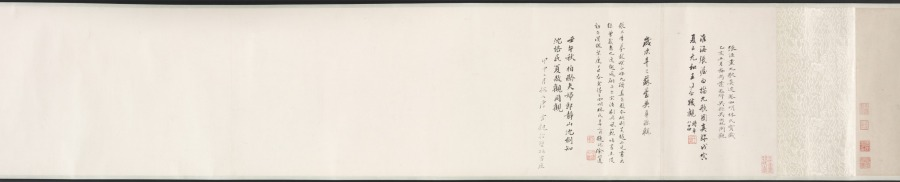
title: Nine Songs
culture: China, Yuan dynasty (1271-1368)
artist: Zhang Wo (Chinese, active c.1336–after 1364)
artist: Chu Huan (Chinese, active 1361)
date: 1361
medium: handscroll; ink on paper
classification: Painting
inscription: 7 colophons and 47 seals: 1 colophon, dated 1361, and 28 seals of Chu Huan 褚奐 (active c. 1361); 1 colophon, dated 1785, and 1 seal of Lu Shihua 陸時化 (1714-1779); 2 seals of Lu Yü-ch'ing (18th c.); 1 colophon, dated 1935, of Ye Gongchuo 葉恭綽 (1881-1968); 1 colophon, dated 1935, of Wu Hufan 吳湖帆(1894–1968); 1 colophon, dated 1938, and 1 seal of Wang Tongyu 王同愈 (1856-1941); 1 colophon, dated 1941, of Wu Huayuan 吳華源 (1893-1972); 1 colophon, dated 1942, and 9 seals of Xu Bangda 徐邦達 (1911–2012); 1 colophon, dated 1942, of Lang Jingshan 郎靜山 (1892-1995); 1 colophon, dated 1944, of Tang Yun 唐雲 (1910-1993); 6 seals of Wang Jiqian [C.C. Wang] 王季遷 (1907–2003).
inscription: Text of The Nine Songs written by Chu Huan at the end of each section.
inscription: 右離騷九歌圖，宋龍溟居士李公本，淮南張渥叔厚所畫妙絕當世。家藏請予書其辭目識于左。至正二十一年辛醜三月旦河南褚奐記。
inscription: Colophon by Lu Shihua 陸時化 (1714–1789): This scroll is fortunate to have been handed down from collections of the right people. Now, after 500 years, its condition is as good as when it was painted. I acquired this from Mr. Shen Guiyu [1673-1769], the President of the Board of Rites. The label is in his handwriting when he was 95 years old. I submit that Chu Huan (t. Shiwen) of the Yuan Dynasty was a native of Qiantang. His "seal" and li writings are in the style of Wu Rui. For example, in [Chu Kuei's] Ming ji lu [A list of masterpieces] is recorded the stele commemorating the restoration of the prefectural school of Kun-shan, the text of which was composed by Yang Weizhen in the twenty-first year of Zhizheng [1361]; and the calligraphy as well as the title in li style was by Chu Huan, who was at that time an assistant judge of the prefecture of Haining in the circuit of Hangzhou. Zhang Wo's zi is Shuhou (叔厚). His literary name is Zhen Qisheng (贞期生). According to [Gu Ying's] Yu shan cao tang ya jii, he liked to paint in the bai-miao or the "pure delineation" style after the method of Li Longmian [Li Gonglin 李公麟], which finds no peer among the ancient masters. This is agreed upon [by Pei Ch'iung] in his Qing jiang zhi who praised [Zhang Wo] as being quite learned and well-versed in many branches of the arts, especially figure painting. Recorded by Lu Shihua [The mountain dweller], listening to the pine, in the twelfth month of the yisi year [1785].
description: Painted in the baimiao, or fine-line drawing style, this ancient work demonstrates the literati’s use of abstract calligraphic brushwork for self-expression. The subject of the “Nine Songs”—songs associated with shamanistic rituals in the ancient Chu kingdom—had traditionally provided artists with myths and legends that they could explore and reinterpret in their own works.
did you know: Divided into eleven sections, the scroll contains illustrations by painter Zhang Wu followed by a transcription of the relevant verse by calligrapher Chu Huan.